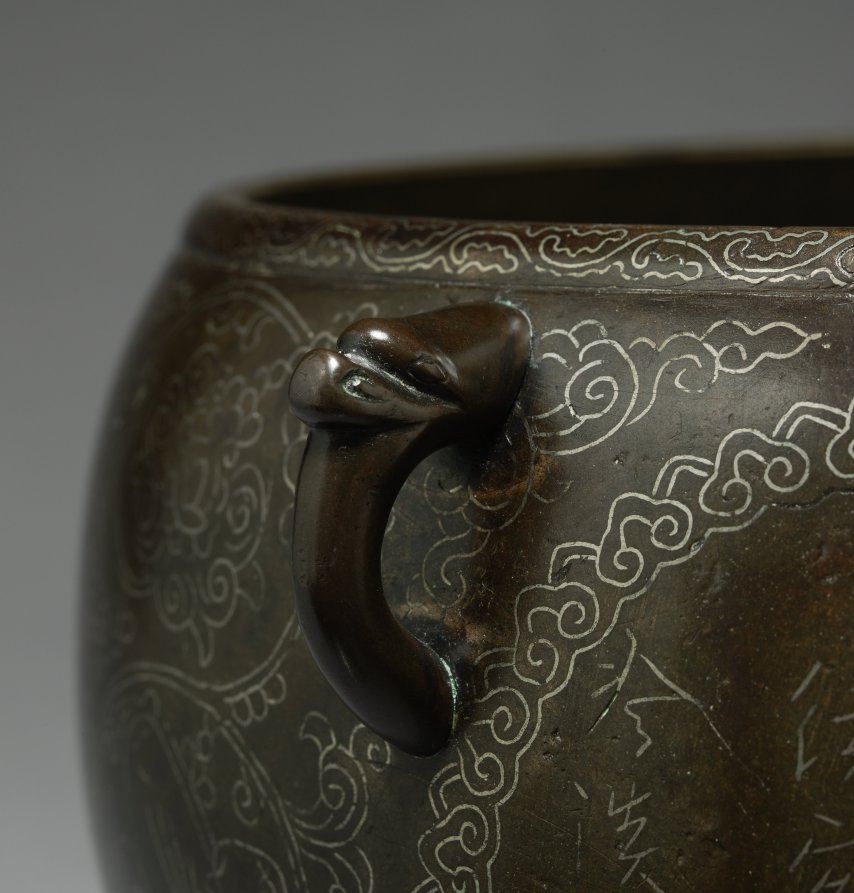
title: Basin with Inscribed Figures and Calligraphy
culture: Korea, Goryeo dynasty (918–1392)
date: 1100s–1200s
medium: bronze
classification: Metalwork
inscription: Each of the three roundels contain five-character, four-line poems with Buddhist messages.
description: This bronze basin may have been used for containing purified water. What makes this work charming is its intricate decoration done in silver inlay: the five-character, four-line poems interspersed among images of a child. The poems, which evoke the concept of nonattachment and nonduality, were written by Buddhist monks.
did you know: A child, one of the main decorative elements for this basin, is possibly a young Buddhist pilgrim named Sudhana, who took a long spiritual journey to search for enlightenment.